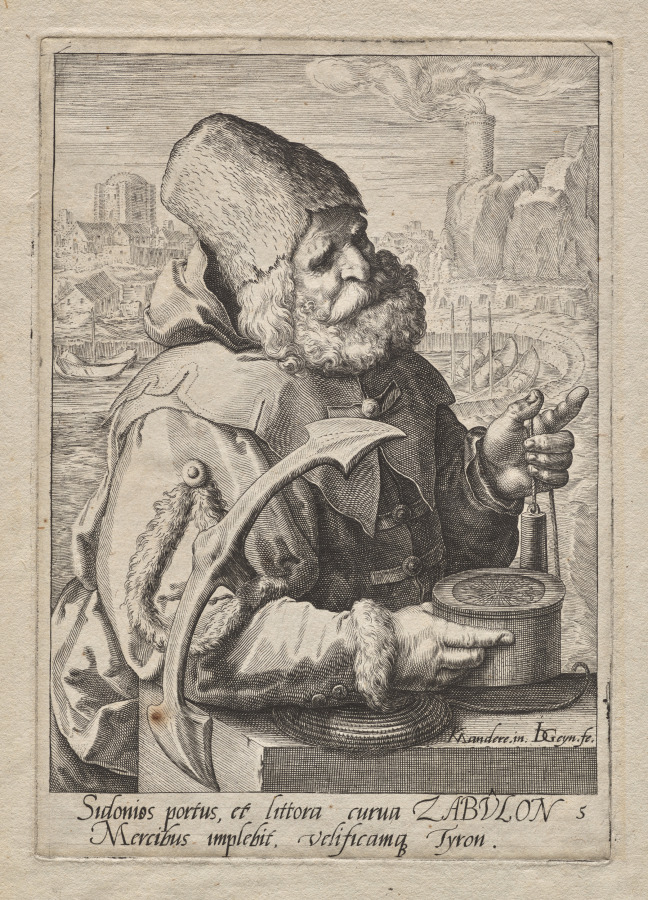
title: Plate 5: Zabulun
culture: Netherlands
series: The Twelve Sons of Jacob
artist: Jacob de Gheyn II (Netherlandish, 1565–1629)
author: after Karel I van Mander (Netherlandish, 1548–1606)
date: c. 1589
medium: engraving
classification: Print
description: n this print, the biblical figure Zabulun is shown holding an anchor and fishing line before a harbor, denoting his tribe’s domicile near the sea. This is one of a series of prints depicting the twelve sons of Jacob, each with an attribute and costume that denotes his character. According to the Old Testament, Jacob blessed each of his twelve sons, prophesizing the destiny of their tribe, and assigning them a parcel of land in Canaan. The print series was made in the Netherlands in the late 16th century, a time of political struggle when Old Testament heroes were popular exemplars of fortitude and patience.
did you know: References to seafaring including a fishing line, anchor, and navigational device, suggest that this Old Testament figure prospers from the merchant trades.